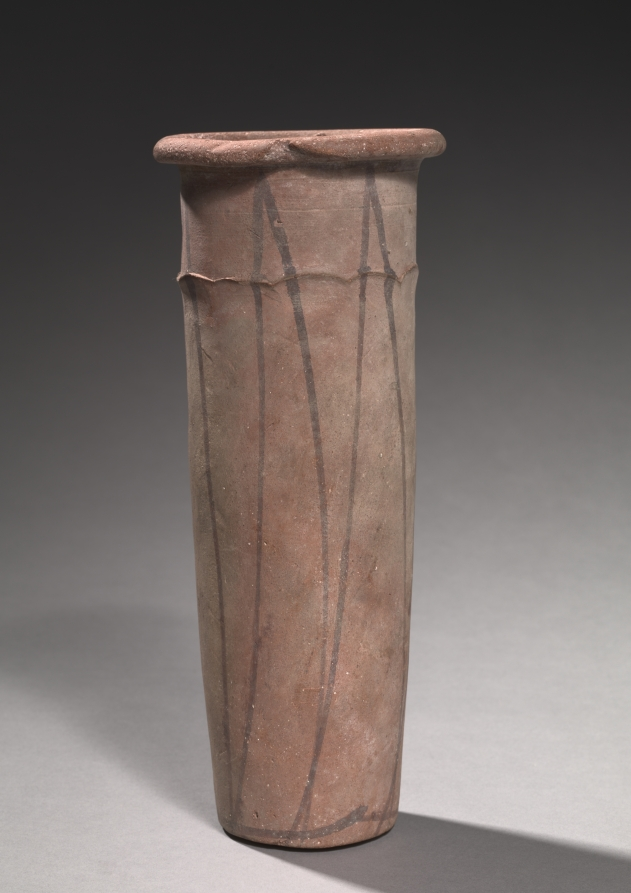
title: Wavy-Handled Jar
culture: Egypt, Predynastic (5000–2950 BCE), Naqada IIa (3650–3300 BCE) or later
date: 4000–3000 BCE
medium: marl clay ware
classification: Vessels